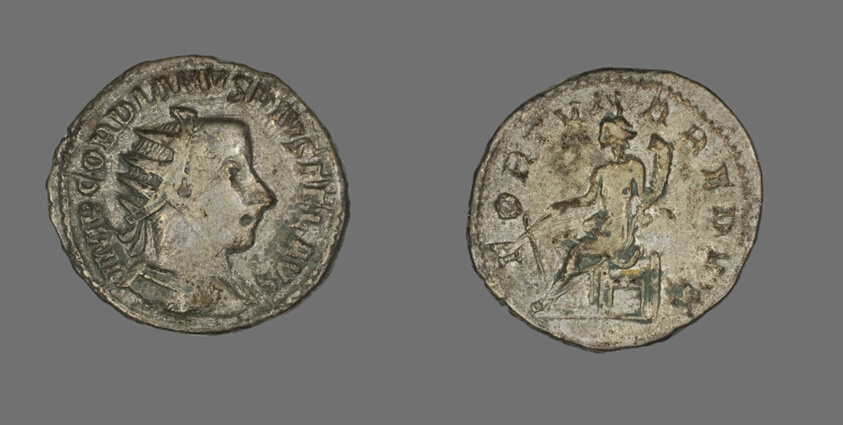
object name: Coin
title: Antoninianus (Coin) Portraying Emperor Gordian III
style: roman (ancient, style or period), ancient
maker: Roman, minted in Antioch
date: 242-244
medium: Billon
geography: Roman Empire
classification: coin; ancient art